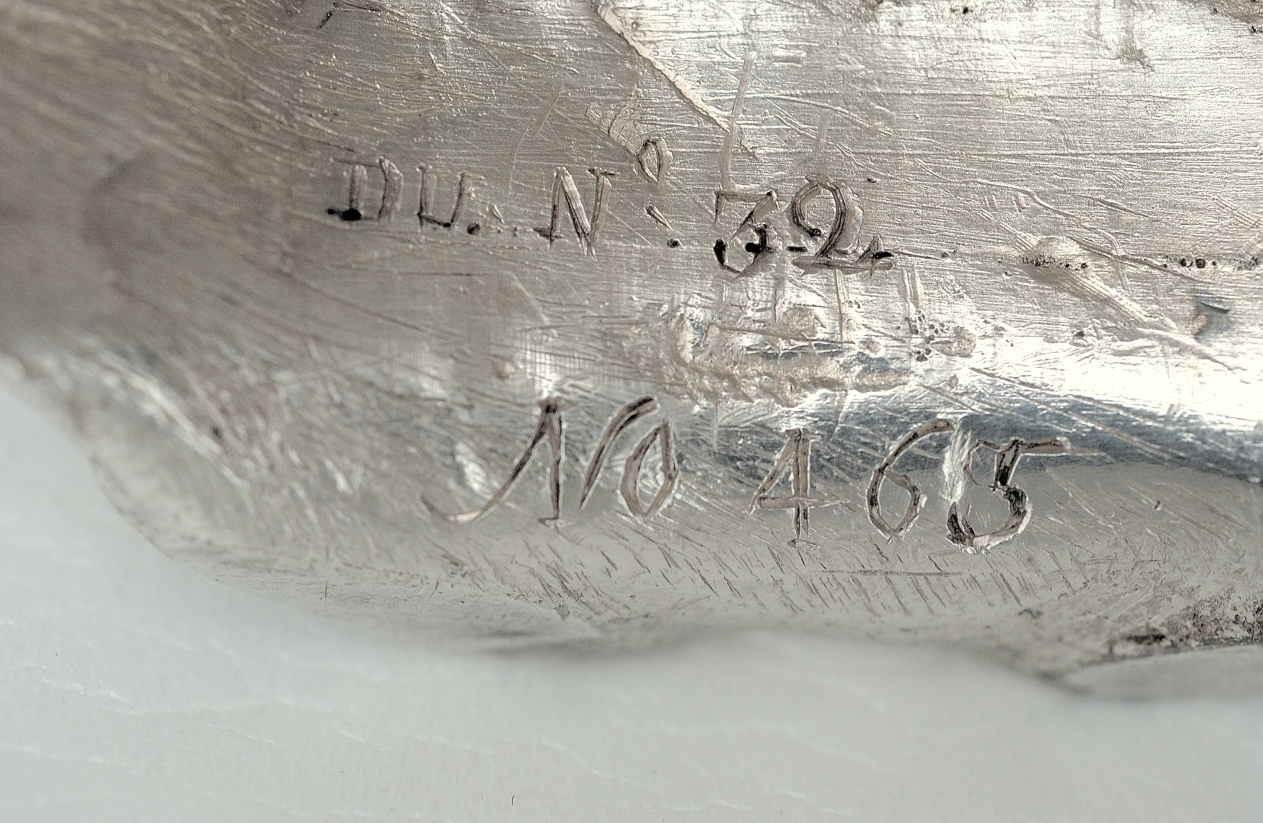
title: Candelabrum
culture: France, Paris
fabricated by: François Thomas Germain (French, 1726–1791)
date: 1757–58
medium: silver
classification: Silver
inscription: [Charge mark of Eloy Brichard , 1756−1762, beneath base]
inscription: [Warden's mark for Paris, 1757-1758, beneath base]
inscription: [Discharge mark for work intended for export, 1756−1775, on base]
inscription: [Hallmarks for Saint Petersburg, on base]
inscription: [Assayer mark of Ivan Frolov, on base]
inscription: [Russian standard of the French silver, on base]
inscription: [Maker’s mark of Francois-Thomas Germain, master silversmith on October 16, 1748, beneath drip pan one each of three bobeches]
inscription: [Charge mark Of Eloy Brichard, 1756−1762, beneath drip pan one each of three bobeches]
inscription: [Discharge mark for work intended for export, 1733 (?)−1775, beneath drip pan one each of three bobeches]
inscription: [Warden's mark for Paris, 1757−1758, beneath drip pan one each of three bobeches]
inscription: [Assayer mark of Ivan Frolov, beneath drip pan of one of three bobeches]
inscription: [Russian standard of French silver, beneath drip pan of one of three bobeches]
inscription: [Charge mark for large work of Eloy Brichard, 1756−1762, on candelabra bayonet attachment]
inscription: [Discharge mark for work intended for export, on candelabra bayonet attachment]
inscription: [Beneath base]: “Fait. Par. F. T. Germain. Sculp[teu]r. Orf[ev]re. Du Roy. Aux. Galleries. Du Louvre. A Paris. 1758”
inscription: [Beneath base]: "Du no.32"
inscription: [Beneath base]: "No 465"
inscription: [Engraved Russian Imperial coat-of-arms, beneath base]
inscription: [Modern inscription in a round paper label, beneath base]: “[?]8” [printed in black]: “3120” [written in pencil]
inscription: [Modern inscription in a rectangular paper label, beneath base]: “…IN/FRANCE” [printed in black]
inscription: [Modern inscription in a rectangular paper label, beneath base]: “46” [written in black ink]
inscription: [Engraved cipher composed with two “M”’s (?) surmounted by a royal crown, on base]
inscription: [Engraved, on base]: "No 465"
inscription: [Engraved, on base]: "du No 32"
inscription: [Engraved cipher composed with two “M”’s (?) surmounted by a royal crown, on one bobeche]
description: This candelabrum is part of a pair. Its design blurs the line between function and decoration. The arms twist and curve, appearing as flower stems while physically supporting the candles. Though this visual unity is typical of the Rococo style, the influence of the rising neoclassical style is evident in the allegorical scenes of light that decorate each candelabra’s stem.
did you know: These candelabra are part of a dinner service sent from Paris, France, to Saint Petersburg, Russia, in two separate shipments, the first of which contained 270 objects for 8 dozen place settings.